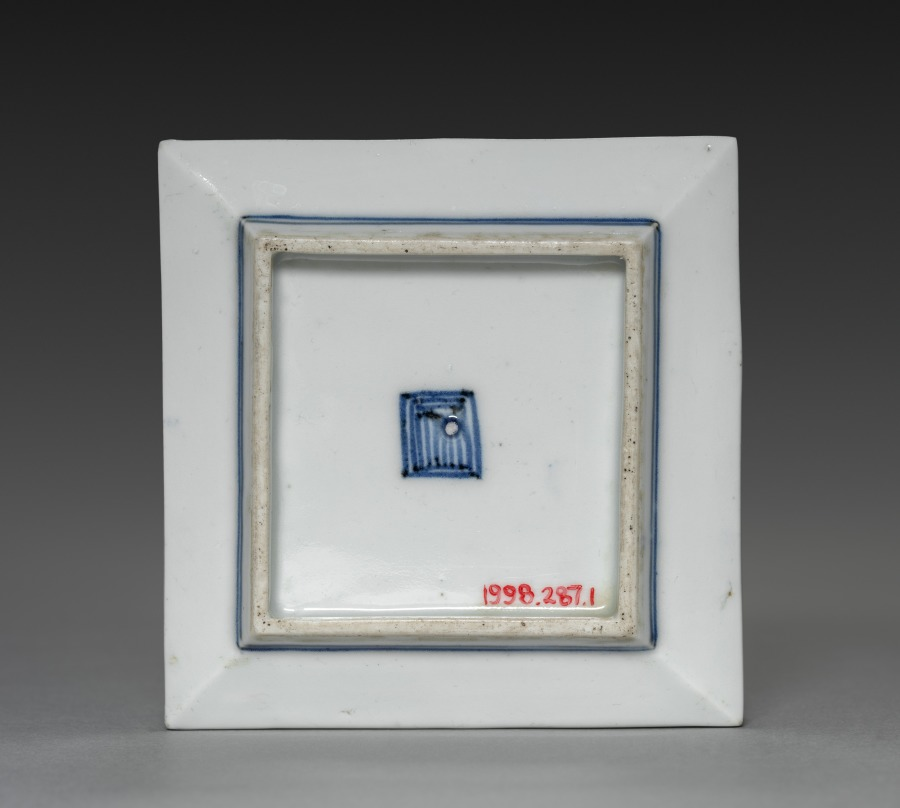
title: Side-Dish with Dandelion in Rocks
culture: Japan, Edo period (1615–1868)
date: 1700s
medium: One of a set of five dishes; porcelain with underglaze blue and overglaze iron oxide (Arita ware, Kutani style)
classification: Ceramic